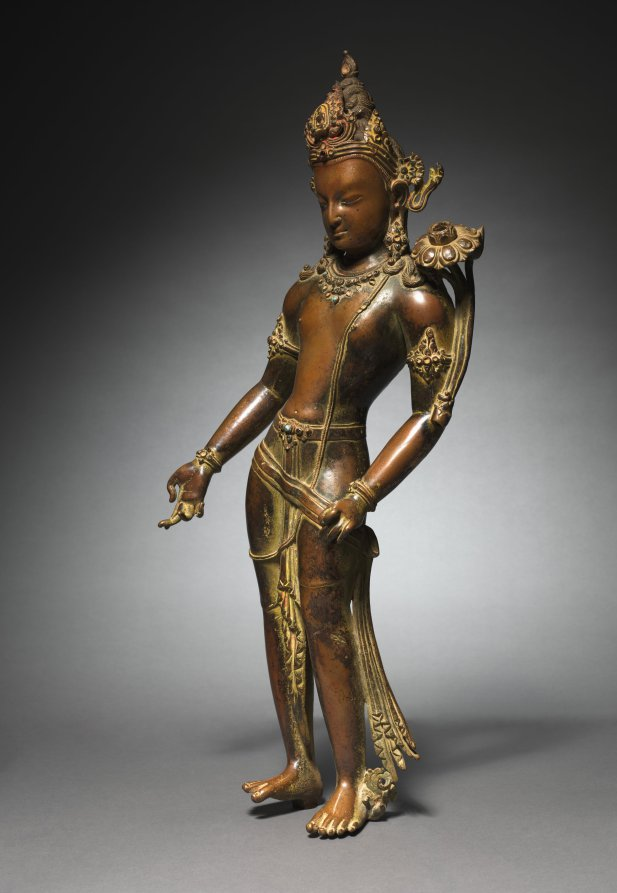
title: Avalokitesvara Padmapani: Bodhisattva of Mercy Bearing a Lotus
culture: Nepal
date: c. 1000s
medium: bronze with gilding, pigment, and semiprecious stones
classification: Sculpture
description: Venerated by Buddhists across the world as the perfect embodiment of compassion for all beings, this bodhisattva-a being only one stage away from complete enlightenment-holds his right hand out gently in the gesture of gift-giving. In his left hand, he once grasped the stem of a lotus flower that blossoms over his left shoulder, indicative of the abundant benefits that result from acts of loving kindness. All bodhisattvas wear royal garments and jewels, in reference to the historical Buddha’s early life as a prince, prior to his achievement of enlightenment through meditations in the forest. In the center of his crown is the tiny seated image of the meditating Buddha Amitabha that identifies this figure as Avalokitesvara specifically. Nepalese bronzes of the 11th century are solid cast and have an exceptionally high copper content in the alloy that makes the bronze difficult to manage during fabrication. The color achieved by the extra copper creates a distinctive warmth and softness in the sculpture. The flexed toes of the right foot and the swinging to one side of the gathered ends of his garment impart a sense of dynamism to his ongoing act of giving. His facial expression is sweet and placid but sharp, as though he is keenly aware of the sufferings of the world.